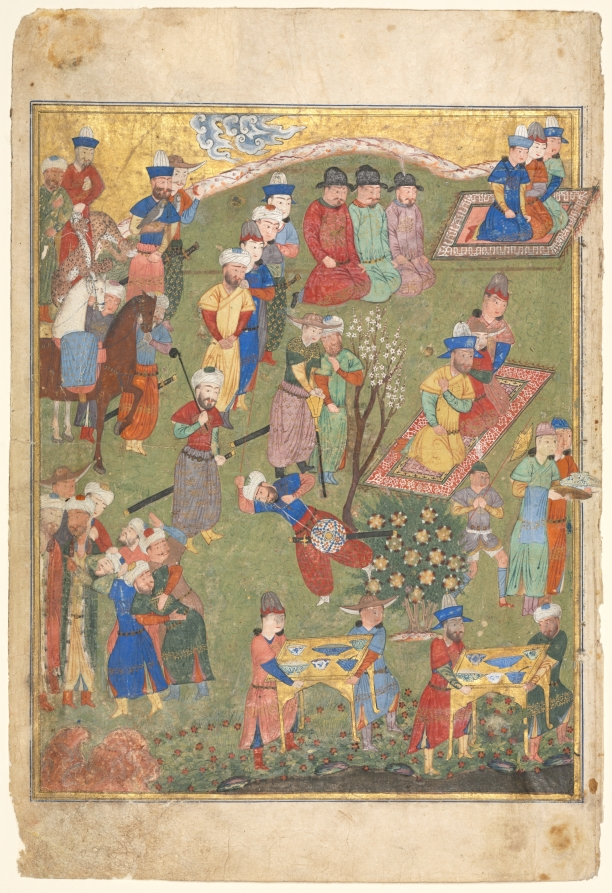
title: Royal Reception in a Landscape, left folio from the double frontispiece of a Shahnama (Book of Kings) of Firdausi (Persian, about 940–1019 or 1025)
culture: Iran, Shiraz, Timurid period (1370-1501)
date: 1444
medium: Opaque watercolor, ink, gold, and silver on paper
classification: Manuscript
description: The royal feast is set in a green landscape dotted with flowers and blossoming bushes against a gold sky with wisps of blue and white clouds. The group of figures in the upper left includes a falconer, horses, attendants, and two hunting cheetahs, while servers transport food and drink in gold and ceramic vessels, some presumably Chinese blue and white porcelain. Possibly this banquet was offered after a courtly hunt, a prestigious symbol of power and wealth. Among the groups of men sitting on elaborate carpets are three Chinese officials, identifiable by their black hats, kneeling together on the ground. Although their presence indicates the presence of foreign cultures within the Timurid court, the painting also reveals that not all are welcome to the feast; in the bottom half of the page a guard wields a stick to drive a group of men out of the garden.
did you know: The painting on this folio is the first half of a double-page frontispiece now detached from a Shahnama (Book of Kings) manuscript. CMA 1956.10 is the left half of the frontispiece.